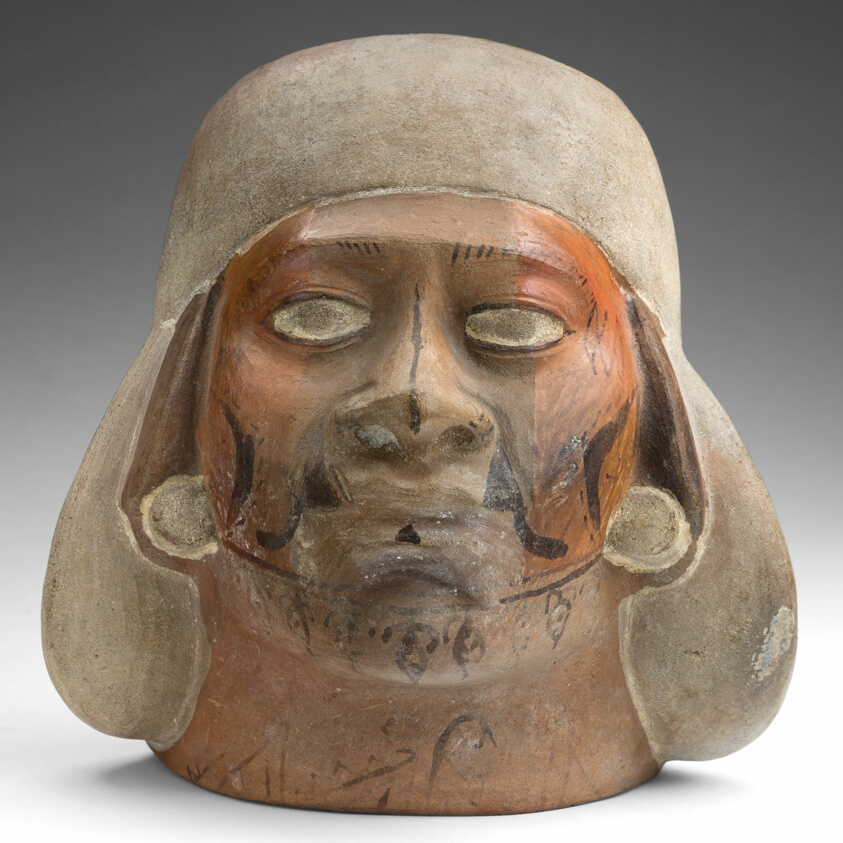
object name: Vessel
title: Portrait Vessel of a Young Man with a Scarred Lip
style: moche, mochica, early intermediate period, Pre-Columbian, americas, andes, Arts of the Americas, andean, south american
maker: Moche (North coast, Peru)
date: 100 BCE–500 CE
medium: Ceramic and pigment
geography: Peru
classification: art of the americas; vessel; ceramics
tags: people, portraits